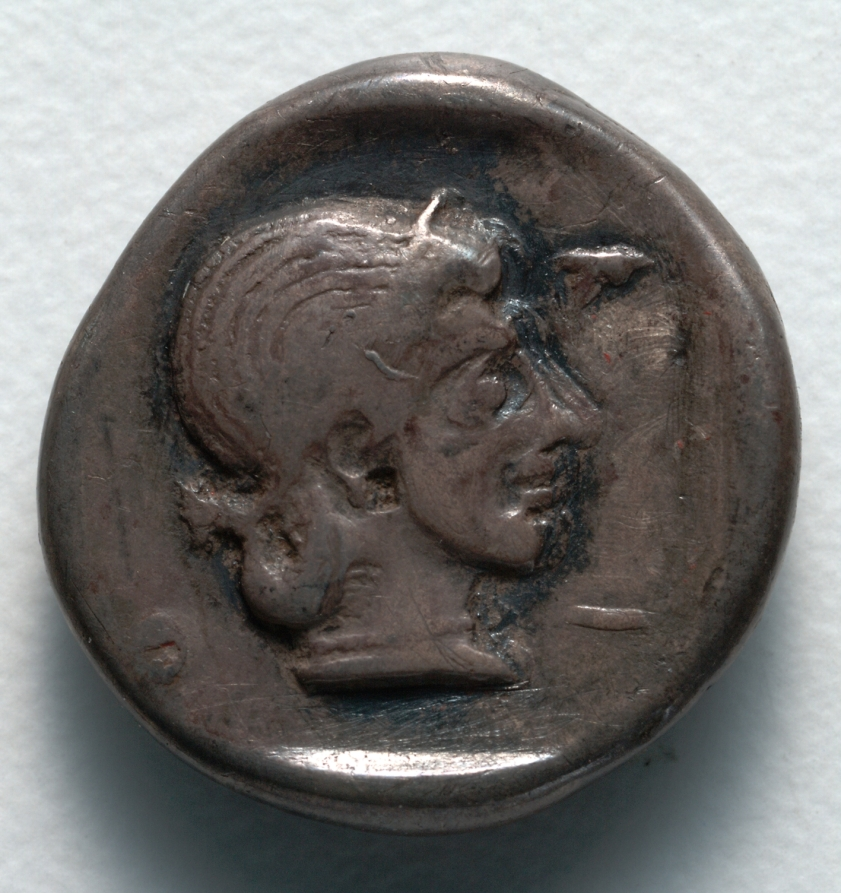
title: Hemidrachm: Head of Artemis (reverse)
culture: Greek, probably minted at Phokikon (Phokis)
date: c. 485–480 BCE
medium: silver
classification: Coins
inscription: Φ[OK]I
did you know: The punches in Artemis’s neck were probably made to check the metal quality.